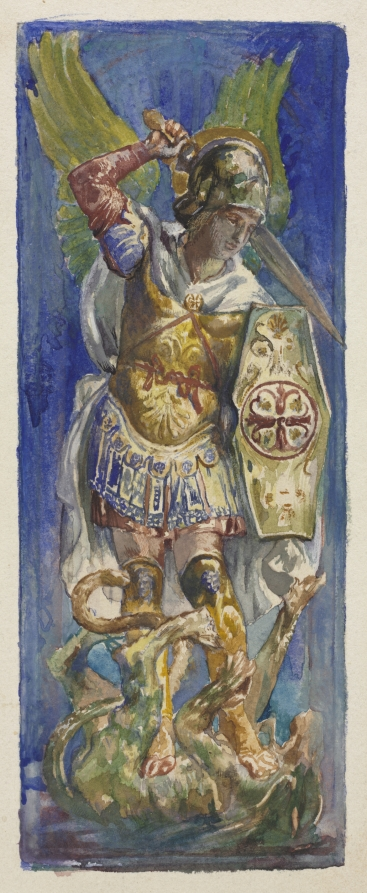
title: Design for Stained Glass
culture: America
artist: John La Farge (American, 1835–1910)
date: c. 1850–1910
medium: watercolor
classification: Drawing